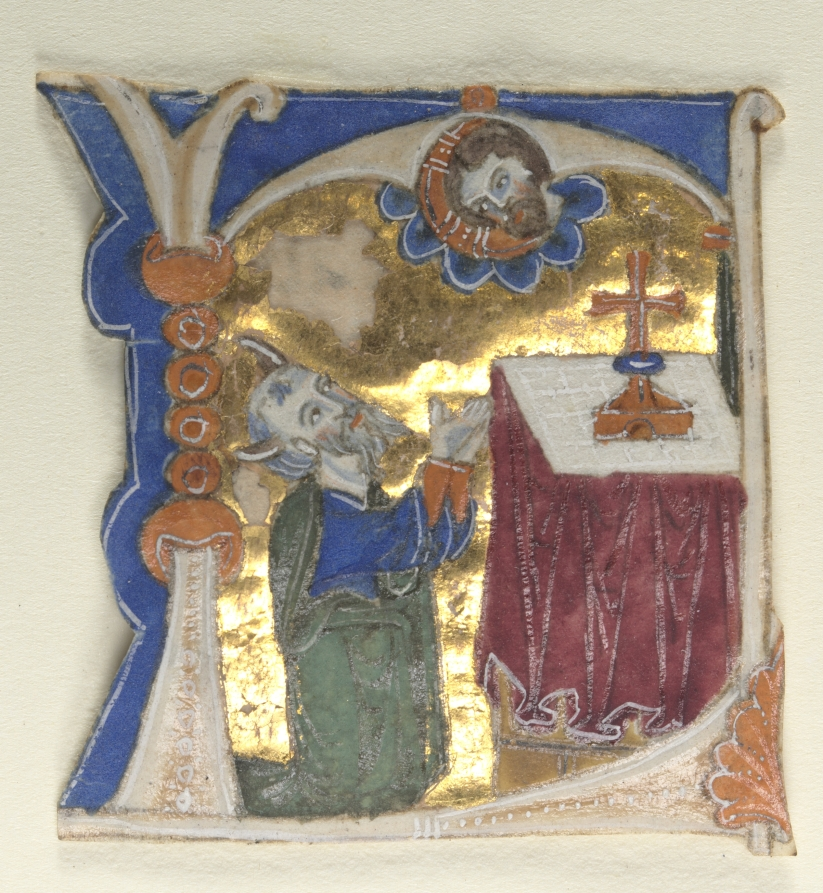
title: Historiated Initial Excised from a Bible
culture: Italy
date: 1200s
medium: tempera and gold on parchment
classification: Manuscript